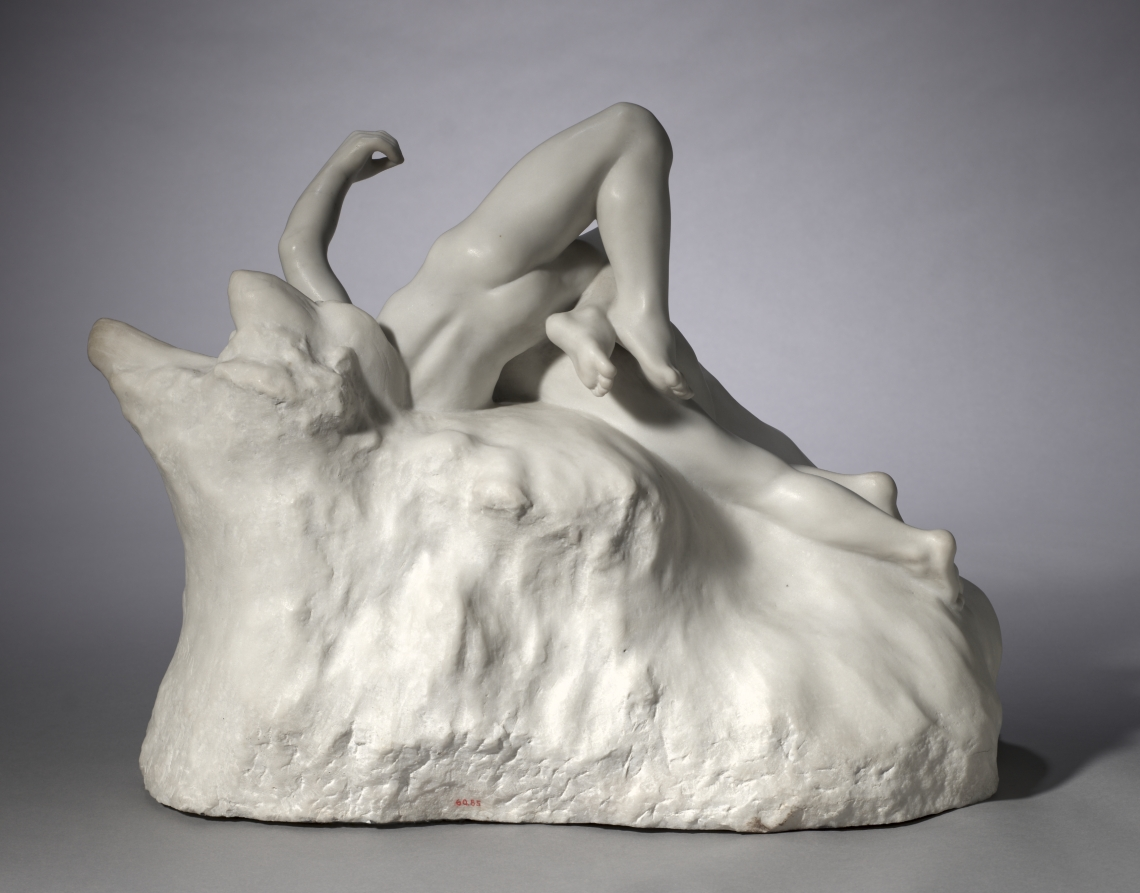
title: The Fall of the Angels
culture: France, late 19th-early 20th Century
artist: Auguste Rodin (French, 1840–1917)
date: c. 1890–1900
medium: marble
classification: Sculpture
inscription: signed under dexter wing of male figure: A. Rodin.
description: The entwined couple in this sculpture recalls the figures on Rodin’s monumental doorway The Gates of Hell. Struck by Dante Alighieri’s descriptions of the damned suffering in hell because of their sins of the flesh, Rodin populated his portal with embracing lovers symbolic of carnal desire and sensual pleasure. Here, a winged figure alludes to the biblical account of the angels who were cast out of Heaven after siding with Satan (Revelation 12:4). Rodin preferred marble for erotic subjects. The juxtaposition between the smooth, sensual surfaces of the figures and the rough-hewn areas below gives the impression that the couple is blossoming into life from hard, lifeless stone.